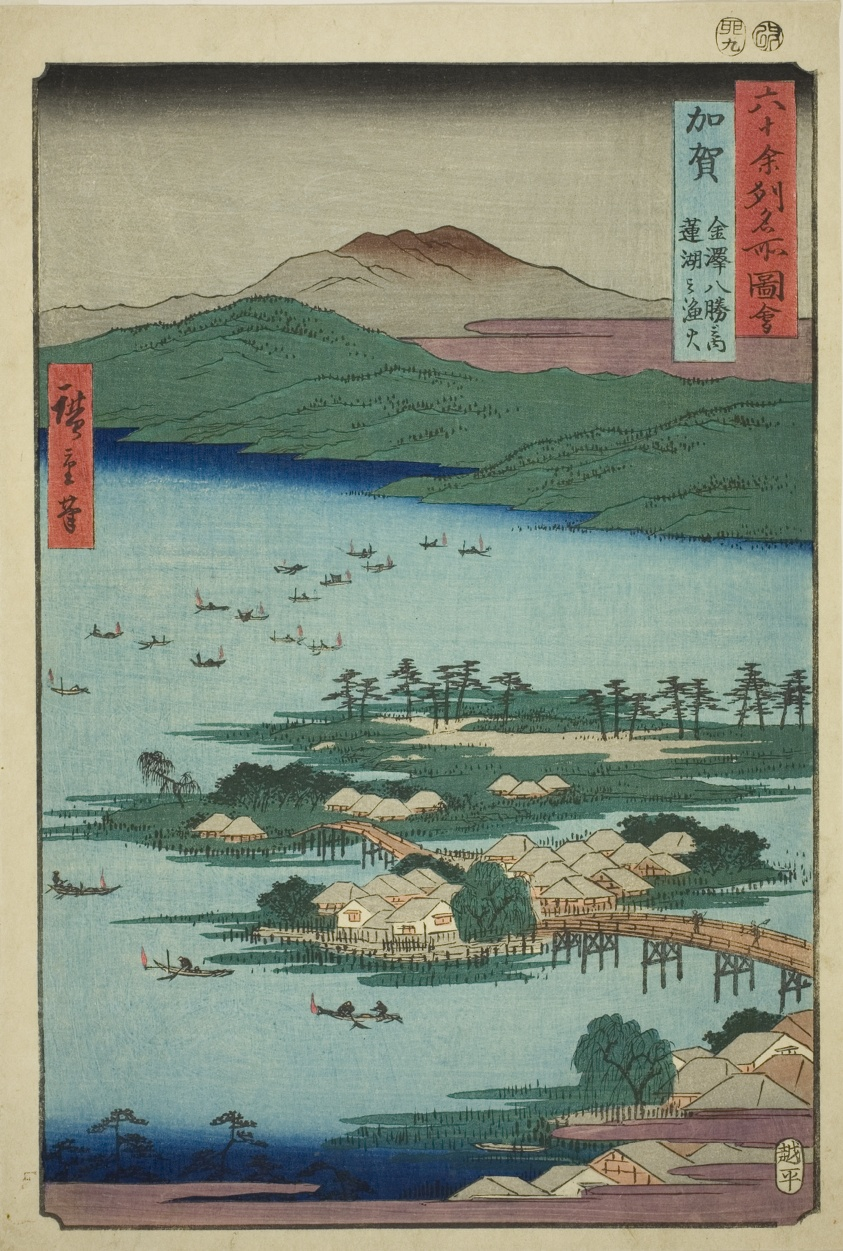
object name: Print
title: Kaga Province: The Fishing Fires on Lake Renko, One of the Eight Scenic Views of Kanazawa (Kaga, Kanazawa hassho no uchi, Renko no isaribi), from the series "Famous Places in the Sixty-odd Provinces (Rokujuyoshu meisho zue)"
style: Japanese (culture or style)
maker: Utagawa Hiroshige 歌川 広重; Japanese, 1797-1858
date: 1855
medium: Color woodblock print; oban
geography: Japan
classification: woodblock print; print; asian art